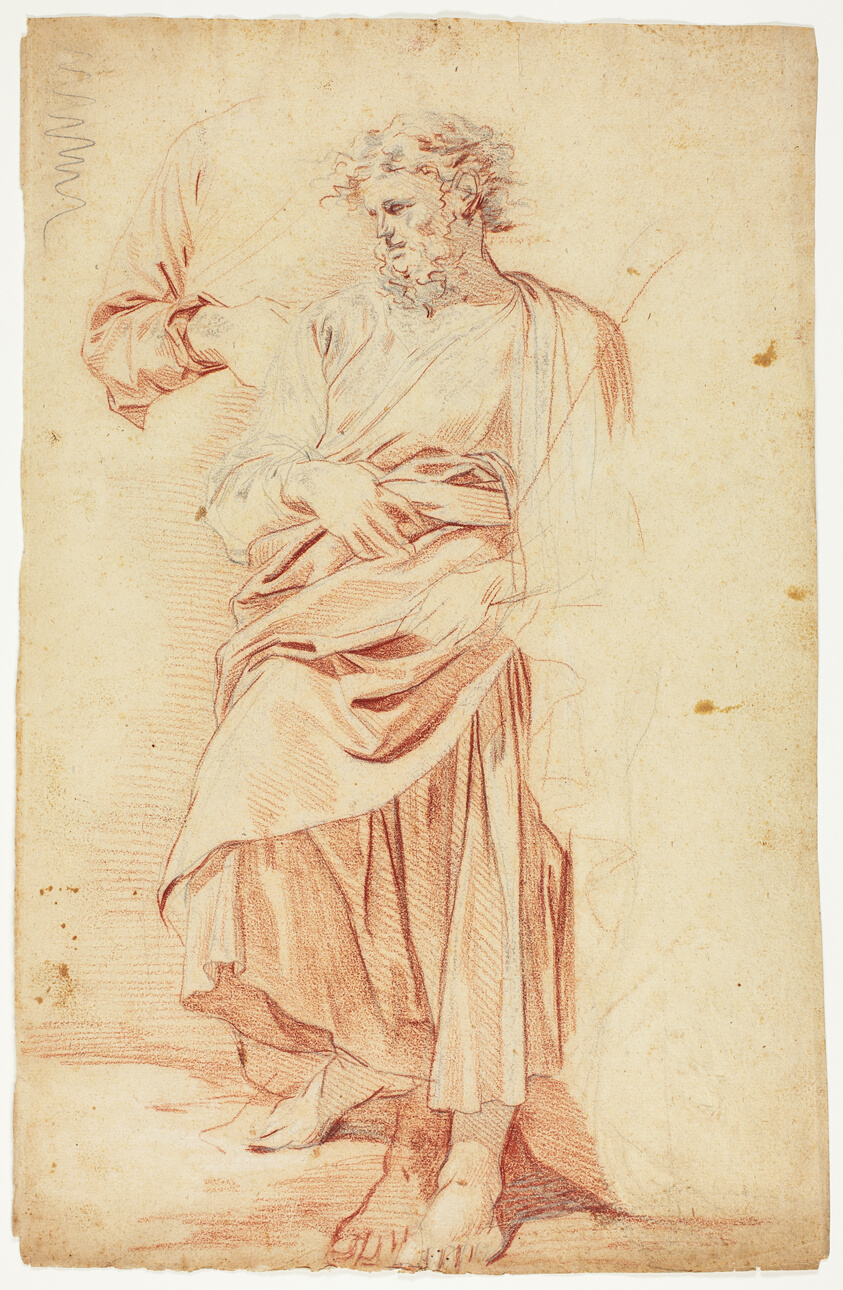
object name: Drawing and Watercolor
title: Sketches of Robed Male Prophet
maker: Attributed to Nicolas Mignard; French, 1606-1668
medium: Red chalk, heightened with lead white (discolored), with graphite, on cream laid paper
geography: France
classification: chalk; drawings (visual works); prints and drawing